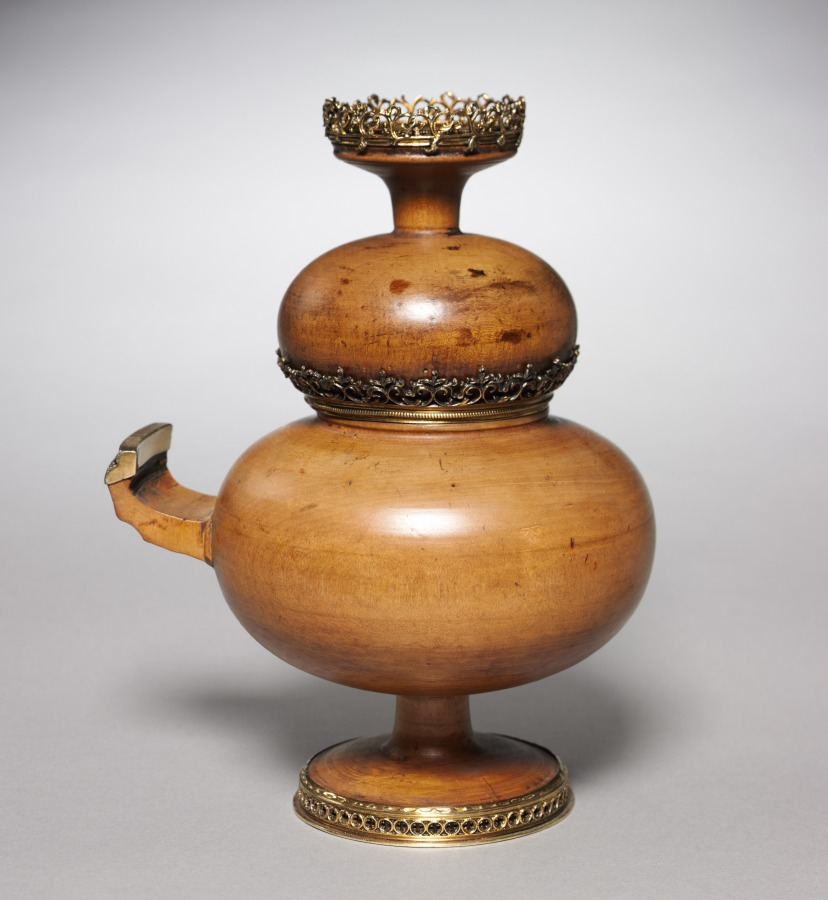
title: Double Cup (Mazer)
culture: Germany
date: c. 1530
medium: maple wood with gilt-silver mounts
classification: Wood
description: A characteristic form of drinking vessel made of close-grained wood, especially maple, was developed in Germany as early as the thirteenth century. It consisted of a larger cup with a foot and a handle and a smaller cup on top. The upper one served as a lid but could also be removed and used as a separate drinking vessel. In this example the smaller upper cup is inset with a memorial portrait medallion of Albrecht Dürer made in the year of his death, 1528. The medal is the work of Matthes Gebel who was active in Nuremberg and Augsburg as a medallist from 1523 to his death in 1574. The reverse of the medal is set into the base of the larger lower cup.